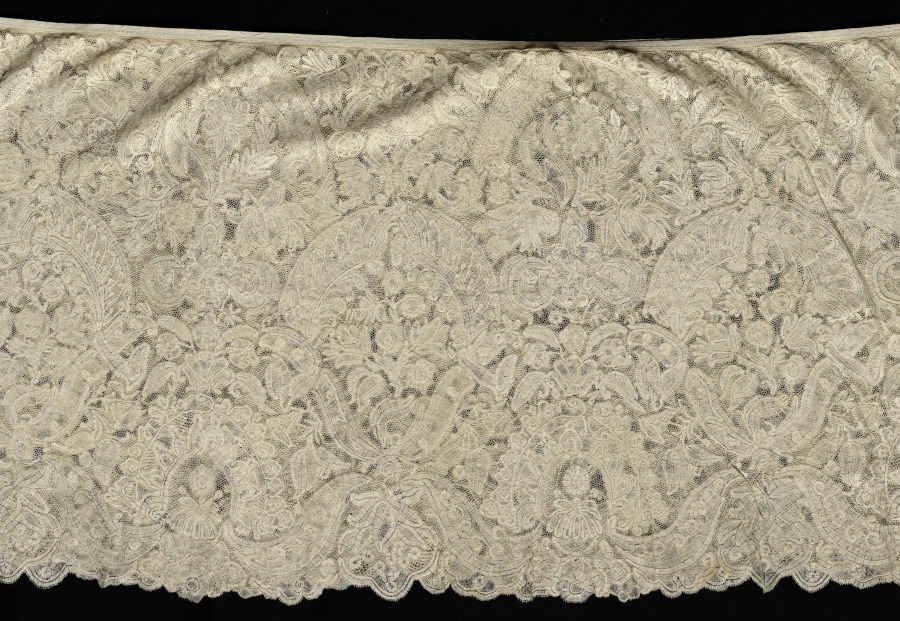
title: Lace Flounce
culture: Flanders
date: 1700s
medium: Bobbin lace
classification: Lace